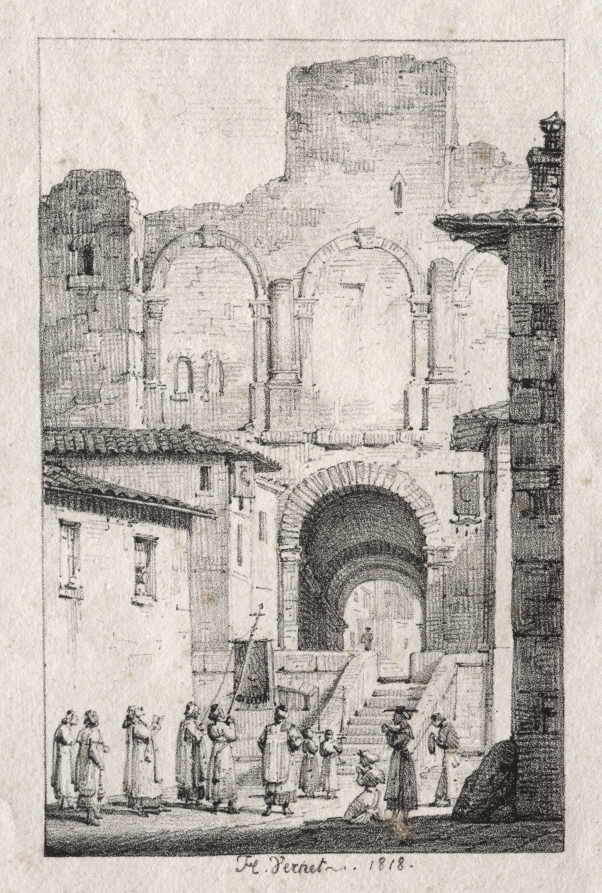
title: Procession at Arles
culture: France, 19th century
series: Lithographic Album by Hce. Vernet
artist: Horace Vernet (French, 1789–1863)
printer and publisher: Delpech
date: 1818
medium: lithograph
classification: Print